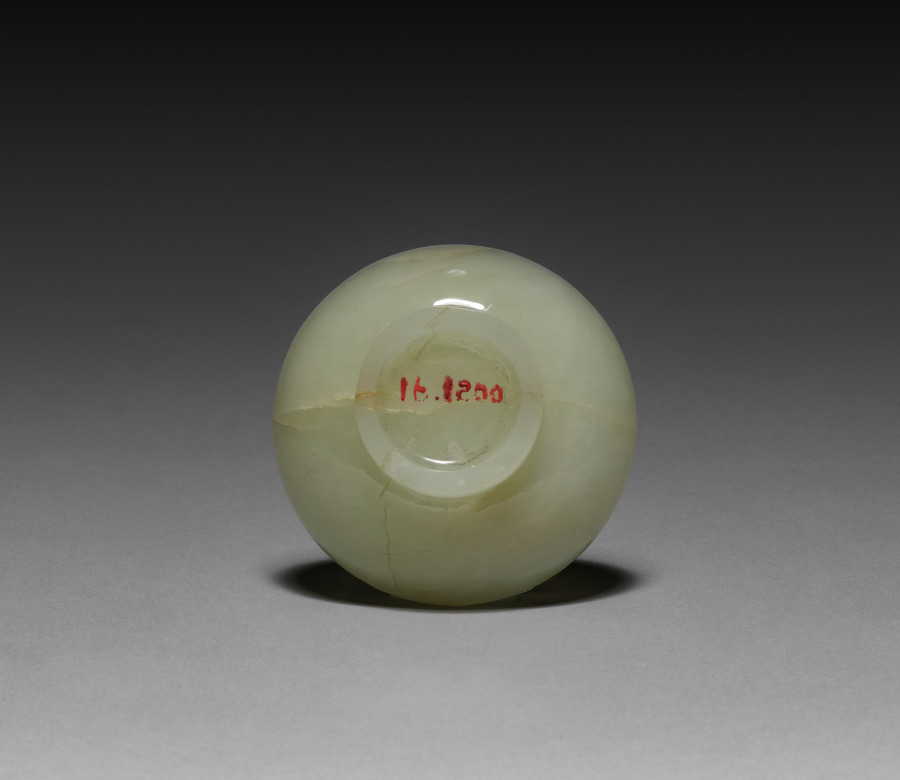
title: Box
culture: China, Qing dynasty (1644-1911)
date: 1644–1911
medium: jade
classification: Jade